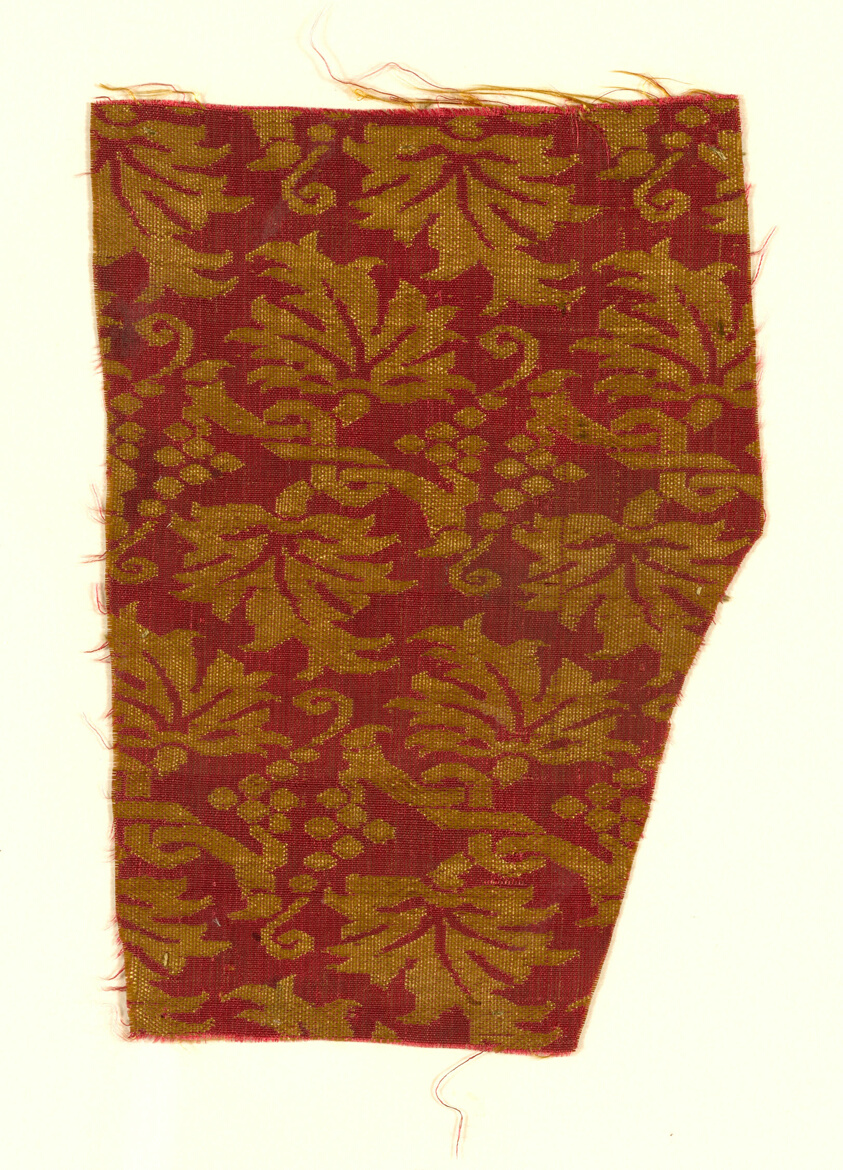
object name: Textile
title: Fragment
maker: Italy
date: 17th century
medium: Silk, plain weave with supplementary patterning wefts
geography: Italy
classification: textile; weaving